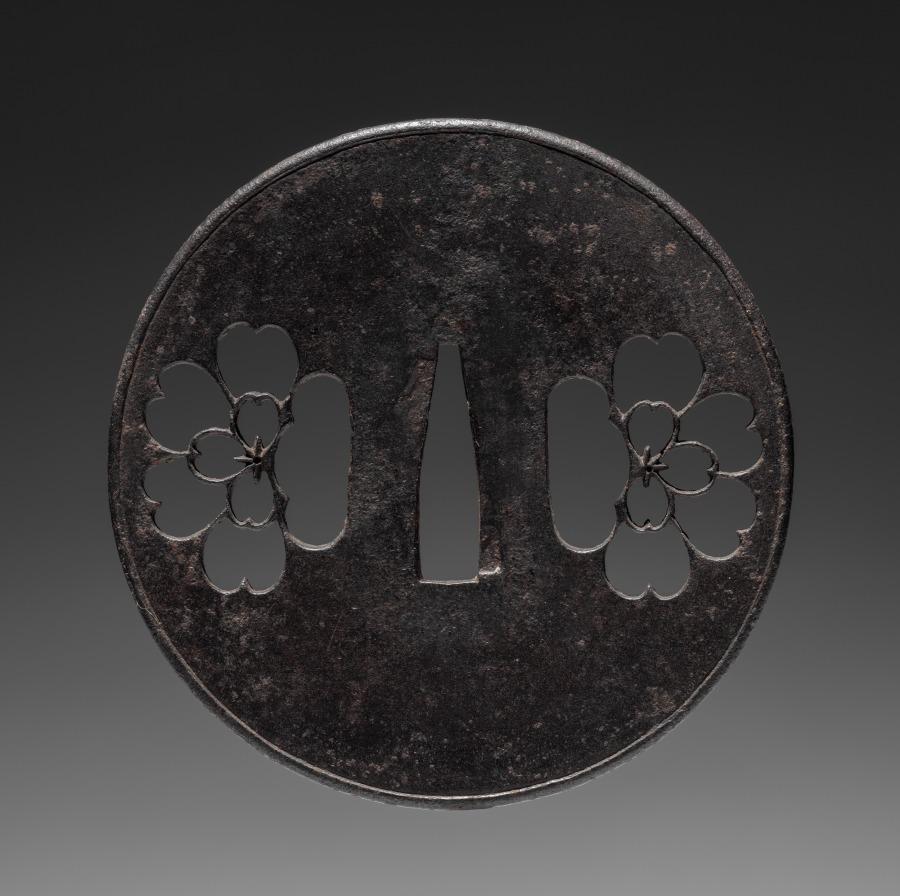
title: Sword Guard (Tsuba)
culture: Japan, possibly Edo period (1615-1868)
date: c. 1615–1868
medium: iron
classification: Arms and Armor